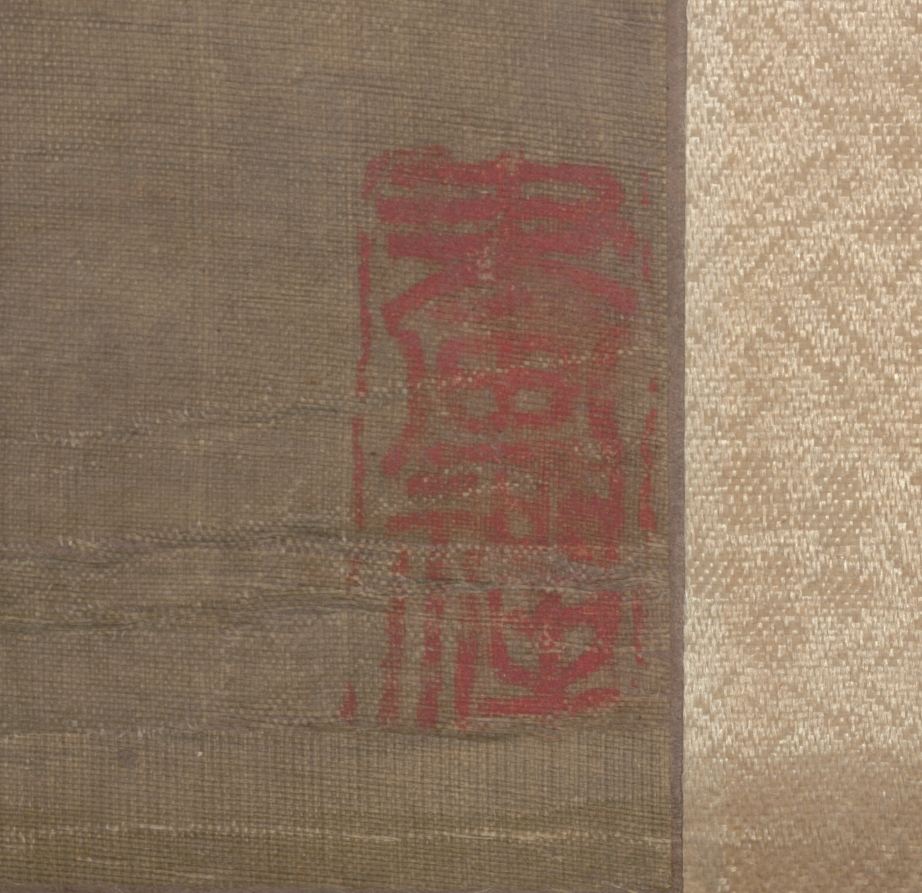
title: Clouds Visiting a Mountain Retreat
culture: China, Ming dynasty (1368–1644)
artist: Tao Hong (Chinese, active c. 1610–1640)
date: 1633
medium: Hanging scroll; ink on silk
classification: Painting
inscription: Artist's inscription, signature and two seals: Imitating Kao Fan-shan's [Kao K'o-kung's] brush at Liu-yün-ho [Valley of Lingering Clouds] during a spring day in the kuei-yu year [1633]. Yen-shan, T'ao Hung [seals] T'ao Hung chih-yin; tzu Ch'iu-shui. (Translated by Wai-Kam Ho)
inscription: 1 additional seal unidentified.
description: Little is known about Tao Hong who settled in Nanking in the latter part of his life. His son was a friend of the leading Nanjing school artist Gong Xian (on display nearby). When the Ming dynasty collapsed in 1644, Tao joined the loyalist resistance in Yunnan province. By 1645 the Manchu invaders had defeated the Yunnanese forces, prompting Tao to flee to Burma, where he died shortly thereafter. Only five of Tao Hong’s works are known to exist, of which this painting is the largest.